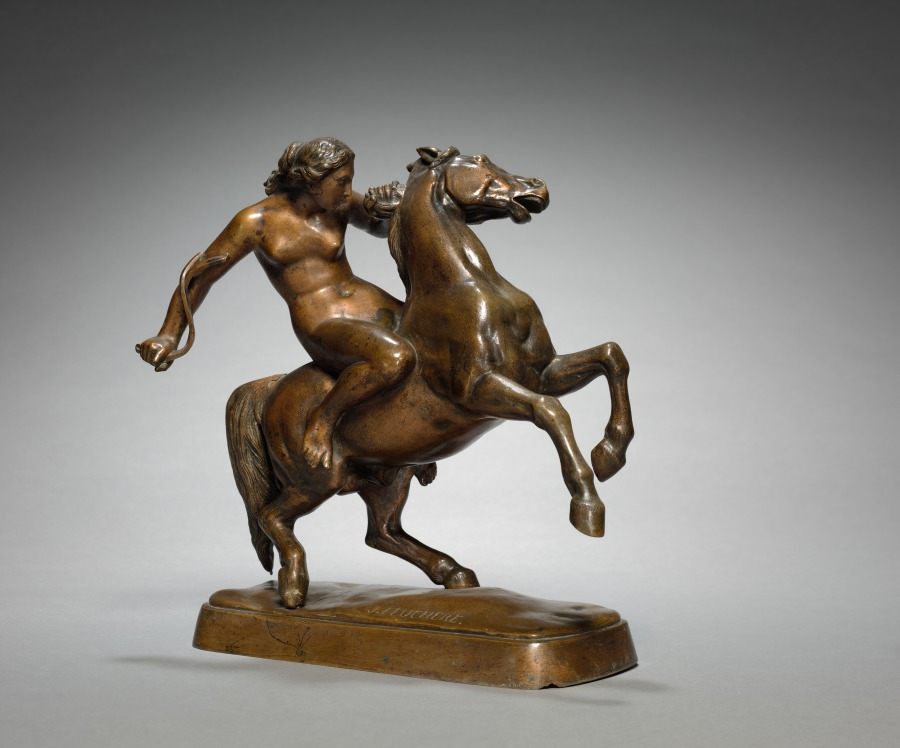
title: Amazon Taming a Horse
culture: France, 19th century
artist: Jean-Jacques Feuchère (French, 1807–1852)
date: c. 1840–1843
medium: bronze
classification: Sculpture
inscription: signed on base: "J. FEUCHÈRE"